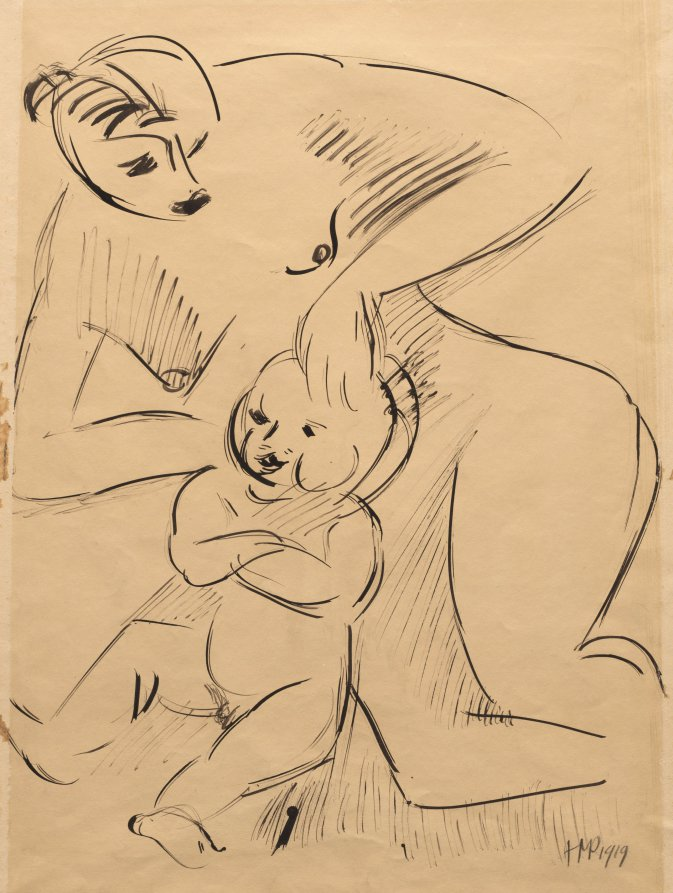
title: Mother and Child (recto)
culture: Germany, 20th century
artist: Max Pechstein (German, 1881–1955)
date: 1919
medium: pen and black ink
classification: Drawing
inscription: signed, lower right, in graphite: [artist monogram: HMP] 1919